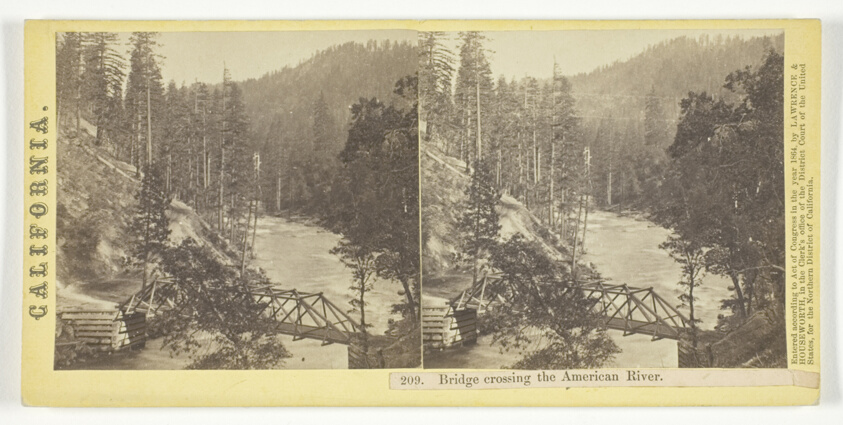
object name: Photograph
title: Bridge Crossing the American River, California, No. 209 from the series "California"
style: 19th century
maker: Lawrence & Houseworth; American, active 1860s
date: 1864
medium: Albumen print, stereo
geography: United States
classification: stereograph (albumen); albumen silver print; photographic process; photography; photograph